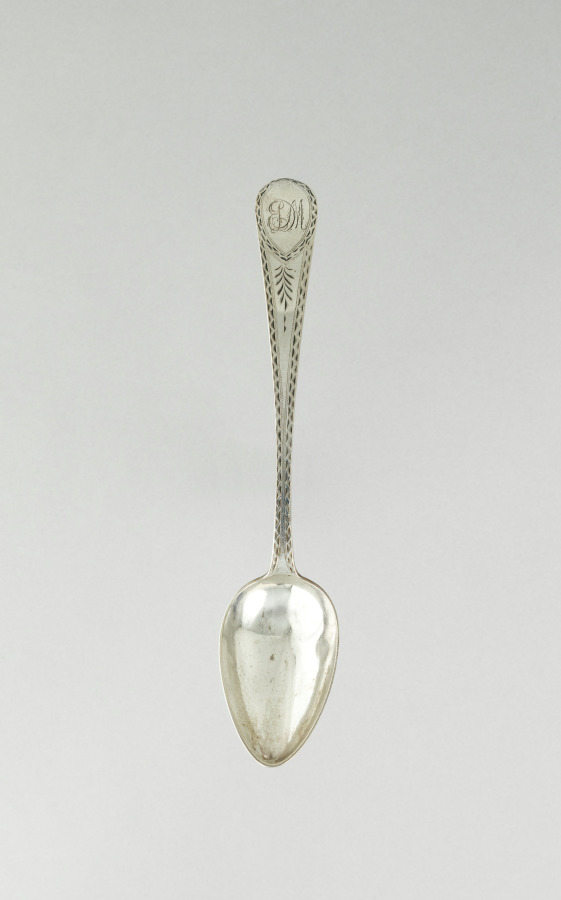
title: Tablespoon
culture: America, Massachusetts, Newburyport, 18th century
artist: Joseph III Moulton (American, 1744–1816)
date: c. 1790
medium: silver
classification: Silver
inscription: engraved "EDM" in bright-cut script within a reserve on top of handle end.